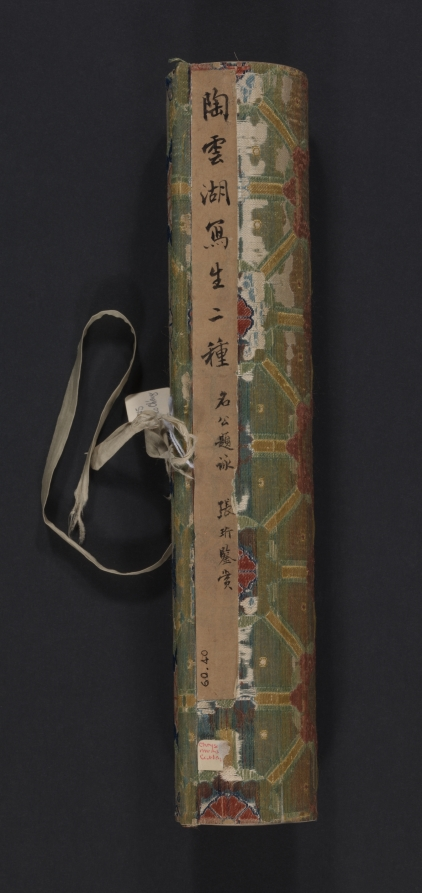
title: Chrysanthemums and Cabbage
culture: China, Ming dynasty (1368–1644)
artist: Tao Cheng (Chinese, active c. 1471–after 1502)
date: c. 1486 or before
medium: handscroll, ink and slight color on paper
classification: Painting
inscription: Artist's seal at beginning of painting: Yun hu 雲湖. Title by Wang Wenzhi 王文治 (1730–1802), date 1756. 2 seals of Wang Wenzhi 王文治 (1730-1802); 3 seals of Ku Yün (n. d.)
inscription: Section A (Chrysanthemums): 1 poem and 1 seal of Zhang Yuanzhen 張元禎 (1437–1507) - Jinshi, 1461; 1 poems and 3 seals of Ni Yue 倪岳 (1444–1501) - Jinshi, 1464; 1 poems and 2 seals of Zhao Xiang 趙祥 (life dates unknown) - Jinshi, 1469; 1 poems and 1 seals of Wu Xixian 吳希賢 (1437–1489) - Jinshi, 1464; 1 poems and 1 seals of Lü Chang 呂㦂 (1449–1511) - Juren, 1471; 1 poems and 3 seals of Fu Han 傅瀚 (1435–1502) - Jinshi, 1464; 1 poems and 1 seals of Feng Jue 馮珏 (life dates unknown) - Jinshi, 1478.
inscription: Chrysanthemums section, poem 1, by Zhang Yuanzhen 張元禎 (1437–1507): Several bushes of chrysanthemums grow in front of the Five-Willow Cottage,/ The yellow ones are really yellow and the white ones white./ This affable and decent fellow, young in years and unsophisticated,/ Has snapped one of the branches to dip in ink. (The Five-Willows Cottage was the home of the poet Tao Qian 陶潛 (Tao Yuanming 陶淵明, AD 365-427).) Chrysanthemums section, poem 2, by Ni Yue 倪岳 (1444–1501): Where at the Eastern Fence can you grieve for the Soul of the Xiang River?/ A man of upright character is mourned within the traces of ink./ White jade with a slight flaw would be a grievance forever,/ Later men should understand why even the roots of the flowers are washed. (Eastern Fence refers again to the poet Tao Qian 陶潛, while the Soul of the Hsiang River refers to the poet Qu Yuan 屈原 (c. 340–278 BC).) Chrysanthemums section, poem 3, by Zhao Xiang 趙祥 (life dates unknown): A clump of chrysanthemum grows in front of the bamboo pavilion,/ The winds of many autumns have blown since we parted beyond the river./ Straining wine through the official's cap of Tao [Qian] to prolong autumn's pleasures,/ The mists and clouds of ten thousand miles belong to the intoxicated. Chrysanthemums section, poem 4, by Wu Xixian 吳希賢 (1437–1489): It is a different spring if mulberry is planted during the latter part of the year,/ The dust of the world originally did not drop on clothing./ Who spills out ink under the Eastern Fence/ And paints so freely this portrait of chrysanthemums for the venerable Sir Tao? Chrysanthemums section, poem 5, by Lü Chang 呂㦂 (1449–1511): This full tray of ink for painting [flowers] at the Eastern Fence;/ Their whiteness or yellowness is not essential in capturing their beauty./ I don't have to go to Jiangnan to see them myself./ At my old house grow two or three branches. Chrysanthemums section, poem 6, by Fu Han 傅瀚 (1435–1502): Who daubed autumn flowers with ink/ As if they were dark dew on a branch tip only vaguely seen at evening?/ After the lazy clouds disperse, no one paints;/ A certain unconventionality pervades this painting. Chrysanthemums section, poem 7, by Feng Jue 馮珏 (life dates unknown): To satisfy his hunger, [the chrysanthemums] have at times entered the poetry of Qu Yuan;/ Taking up the wine cup, it felt close to Tao Qian./ [With them I am like] a lonely root sustained by deep water/ Or an old man to whose hair the color of youth returns.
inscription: Section B (Cabbage): 1 poem and 1 seal of Cai Qi 蔡圻 (life dates unknown) - degree information not known; 1 poems and 3 seals of Ni Yue 倪岳 (1444–1501) - Jinshi, 1464; 1 poem and 3 seals of Jiao Fang 焦芳 (1436–1517) - Jinshi, 1464; 1 poem and 3 seals of Li Dongyang 李東陽 (1447–1516) - Jinshi, 1464; 1 poems and 1 seals of Wu Xixian, signed “Xixian” 吳希賢 - Jinshi, 1464; 1 poems and 3 seals of Fu Han 傅瀚 (1435–1502) - Jinshi, 1464; 1 poems and 1 seals of Lü Chang 呂㦂 (1449–1511) - Juren, 1471; 1 poems and 2 seals of Zhao Xiang 趙祥 (life dates unknown) - Jinshi, 1469; 1 poems and 1 seals of Feng Jue 馮珏 (life dates unknown) - Jinshi, 1478.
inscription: Cabbage section, poem 1, by Cai Qi 蔡圻 (life dates unknown): The ink splashes are fresh from a frosty brush dipped in pond water;/ I can visualize that time when Yunhu 雲湖 [Tao Cheng] first showed his talents./ I lament the places where I scribbled before,/ Who would open them to inscribe a poem? (The first line is an allusion to the famous Jin dynasty calligrapher Wang Xizhi 王羲之 (AD 303-361), who practiced calligraphy so diligently at the edge of a pond that the water turned black with ink.) Cabbage section, poem 2, by Ni Yue 倪岳 (1444–1501): After rain the vegetables begin to grow;/ How are the colors of the masses lately!/ Once you get used to them, the tastiest parts are the ends of the roots;/ I don't know if they can be used for "seasoning soup." ("Seasoning soup" is an allusion to the statesmanship of a chief minister.) Cabbage section, poem 3, by Jiao Fang 焦芳 (1436–1517): This crop of purple stalks and green leaves is late and irregular;/ Now the rainy season is over for the Eastern Garden./ All the nobles nowadays dine on meat;/ Who of them knows the flavor of this [cabbage]. Cabbage section, poem 4, by Li Dongyang 李東陽 (1447–1516): It's always helped the honest man to sober up after drinks./ I intend to go to the deepest part of the stream-crossed garden/ To refresh myself in the fragrance and dew of evening. Cabbage section, poem 5, by Wu Xixian 吳希賢 (1437–1489): After rain, the white silk is filled with fragrant vegetables;/ How many times this happens in Mr. Tao's paintings./ On whom will you depend to present a memorial to the ruler?/ Don't let this color emerge on the faces of the people. (The last line is meant as a warning to officials: the color of the vegetables (green) may be pleasing in itself, but when it emerges on the faces of the starving poor, it signifies a badly governed world.) Cabbage section, poem 6, by Fu Han 傅瀚 (1435–1502): For twenty years I have feasted on the excellent mutton of an official;/ Yet I talk and dream about the garden and its vegetables./ Do not merely say it is good to chew the root of the cabbage--/ You must taste to understand what poverty is. Cabbage section, poem 7, by Lu Chang 呂㦂 (1449–1511): The capital is never a place for an apprentice in the "garden of scholarship."/ Who would write about gardens and vegetables on an examination paper?/ I've walked throughout the country in spring;/ Make sure the people don't show this color. Cabbage section, poem 8, by Zhao Xiang 趙祥 (life dates unknown): After a wash of rain, the spring garden is still in order;/ The flavor [of the cabbage] is more suitable with a small drink and the hum of a tune./ The rich and powerful in their mansions consume dish after dish of meat;/ Vegetarian food is known only by the scholars. Cabbage section, poem 9, by Feng Jue 馮珏 (life dates unknown): A new cabbage is nourished with dew;/ It takes a long time to grow and mature./ The business of "seasoning the soup" is your responsibility;/ Better command the gardener to take care [of the cabbages]. trans. HK/LYSL/WKH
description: On an autumn day in Beijing, Tao Cheng had a gathering with a group of scholar-officials and created two paintings in a spontaneous, casual style. The first depicts chrysanthemums, slender bamboo stalks, and a rock in monochrome ink. Tao applied light colors for the second painting that depicts cabbage. Tao deliberately placed the images on the first sections of the paper so that his honorable guests could add their poetic inscriptions inspired by his imagery. In the first section to the right, all seven poetic inscriptions refer to the beloved poet and recluse Tao Qian (also called Tao Yuanming, AD 365–427) who was particularly known for his profound love for chrysanthemum flowers. Most of the inscriptions in the second section express sympathy for the poor, since cabbage is the main ingredient in their humble food. Taken together, the poems and paintings allude to the life and responsibilities of the scholar-official: the importance of both an upright character and a concern for the poor citizens in order to achieve good government.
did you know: Eminent calligrapher Wang Wenzhi 王文治 was only 27 sui when he wrote the title in 1756.